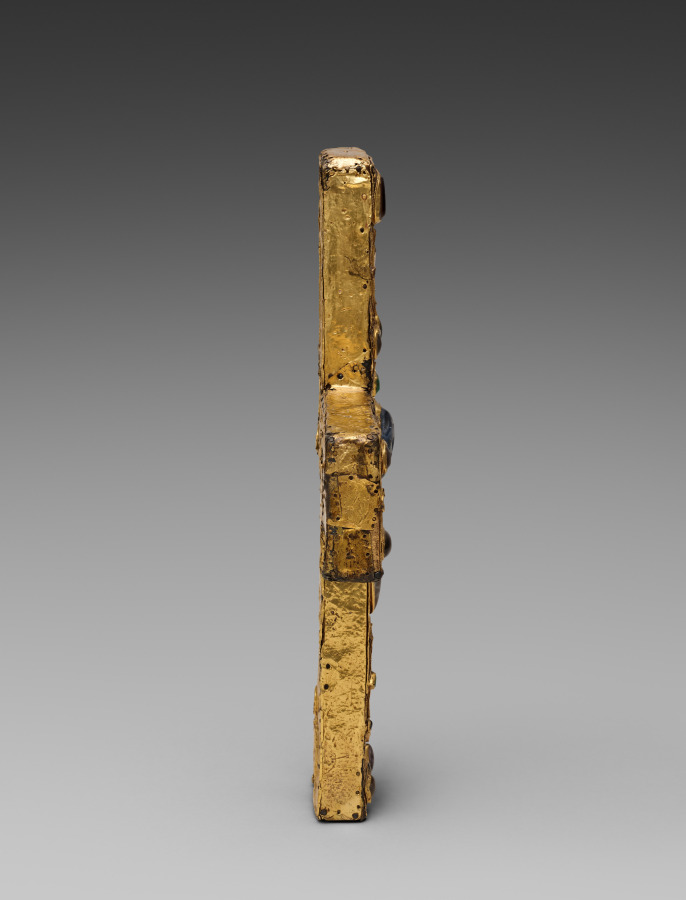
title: Ceremonial Cross of Countess Gertrude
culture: Germany, Lower Saxony?, 11th century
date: 1038 or shortly after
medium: gold: worked in repoussé; cloisonné enamel, intaglio gems, pearls, wood core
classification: Metalwork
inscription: translation of inscription on back: For the Relics of the Holy Apostle Peter and the Holy Virgin Liutrudis, Countess Gertrude Ordered this made.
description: This precious gold cross was commissioned by Countess Gertrude (died 1077) and given to the church of Saint Blaise following the death of her husband, Count Liudolf of Brunswick (died 1038). The cross was intended to be carried in liturgical processions or to be placed on a church altar. The inclusion of relics within the crosses endowed them with an additional role as devotional objects. At the center of the four cross arms, fine but much damaged cloisonné enamel plaques represent the symbols of the four Evangelists--an eagle for Saint John (above); a lion for Saint Mark (on the left); an ox for Saint Luke (on the right); and an angel for Saint Matthew (below). Pearls and precious and semiprecious stones are set within an intricate network of gold filigree while a large sapphire, inscribed in a circle and likewise surrounded by pearls and precious stones, is placed at the crossing.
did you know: Countess Gertrude's name appears on the back of the cross at the bottom.